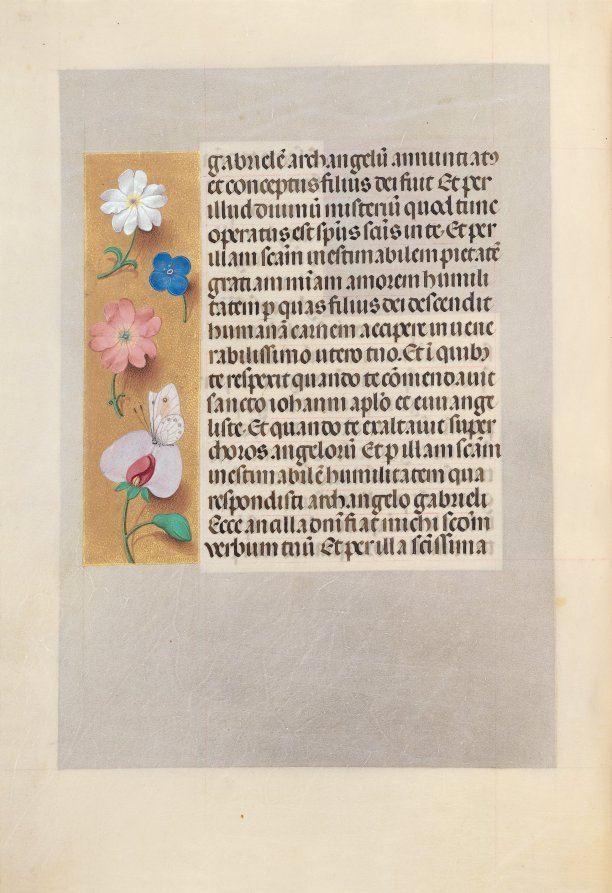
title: Hours of Queen Isabella the Catholic, Queen of Spain: Fol. 258v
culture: Flanders, Ghent and Bruges, late 15th century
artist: Master of the First Prayerbook of Maximillian (Flemish, c. 1444–1519)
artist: and Associates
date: c. 1500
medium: ink, tempera, and gold on vellum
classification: Bound Volume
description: This manuscript was illuminated by a circle of at least five highly organized manuscript painters active in the Flemish cities of Ghent and Bruges. The principal illuminator was Alexander Bening, who painted the majority of the book's miniatures. Manuscripts produced by this circle of artists are renowned for the decoration of their borders, which typically feature a rich variety of realistically-painted flowers, birds, and butterflies. This prayer book, called a book of hours, was intended not for a cleric, but for the private devotions of a lay person-in this case, Isabella the Catholic, Queen of Spain (1451-1504). Isabella's coat of arms embellishes the book's frontispiece. It is unlikely that the book was commissioned by the Queen herself; rather, she probably received it as a diplomatic gift from someone courting her patronage, perhaps Cardinal Francisco Jimenez de Cisneros. A Franciscan friar, Jimenez was dependent upon Isabella for his advancement, first to the post of Queen's confessor in 1492, and then to Archbishop of Toledo in 1495.